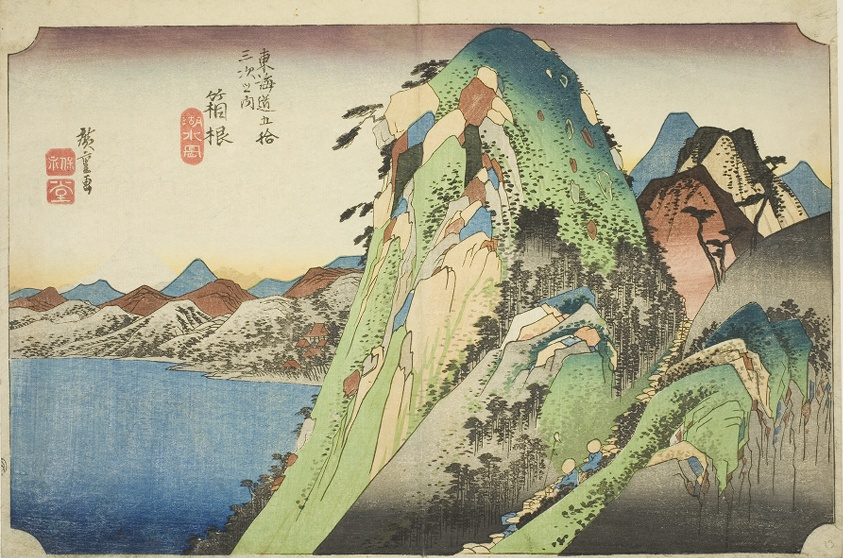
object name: Print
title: Hakone: View of the Lake (Hakone, kosui no zu), from the series "Fifty-three Stations of the Tokaido Road (Tokaido gojusan tsugi no uchi)," also known as the Hoeido Tokaido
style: Japanese (culture or style)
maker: Utagawa Hiroshige 歌川 広重; Japanese, 1797-1858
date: c. 1833/34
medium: Color woodblock print; oban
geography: Japan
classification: woodblock print; print; asian art